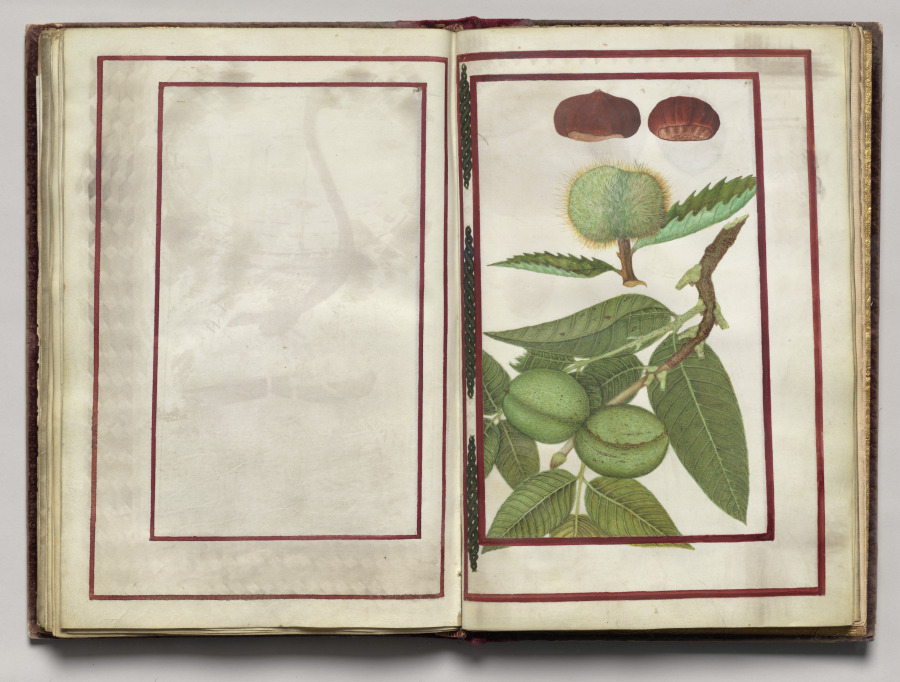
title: Border, folio 42 (verso), from Florilegium (A Book of Flower Studies)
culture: France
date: 1608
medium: watercolor, ink, silver and gold over occasional traces of pencil, on vellum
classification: Bound Volume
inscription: Dated: Poitiers 1608 (on frontispiece) Signed: On frontispiece in black ink, lower right: Van Kuyk Notation on drawing: Frontispiece: in pencil, lower margin: * élève de Van Kessel, peintre flammand (* in pencil also appears in front of Van Kuyk's name).